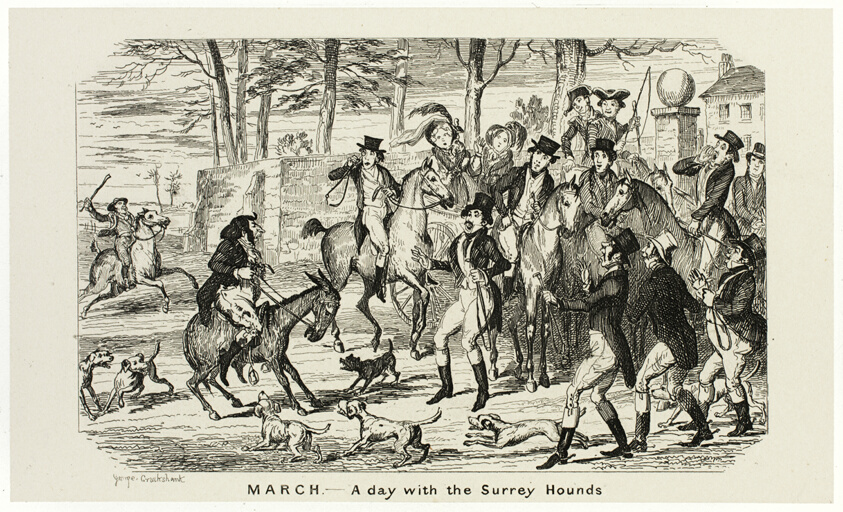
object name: Print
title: March - A Day With the Surrey Hounds from George Cruikshank's Steel Etchings to The Comic Almanacks: 1835-1853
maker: George Cruikshank (English, 1792-1878); published by Pickering & Chatto (English, 19th century)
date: 1840, printed c. 1880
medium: Steel etching in black on cream India paper, laid down on off-white card (chine collé)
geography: England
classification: etching; paper; steel; print; prints and drawing